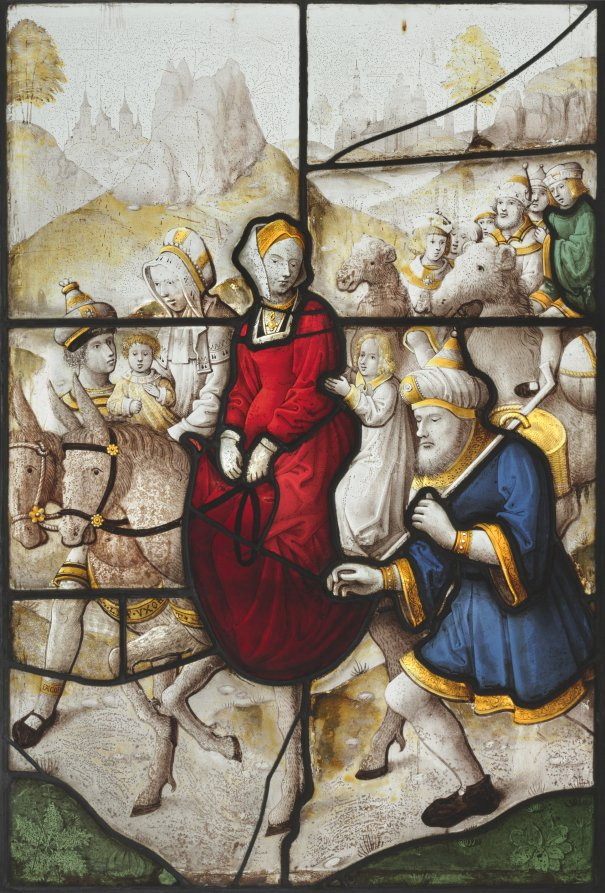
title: Jacob Returning to Canaan with Rachael and Leah Pursued by Laban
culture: North Netherlands, 16th century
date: c. 1525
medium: pot-metal and white glass, and silver stain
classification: Glass